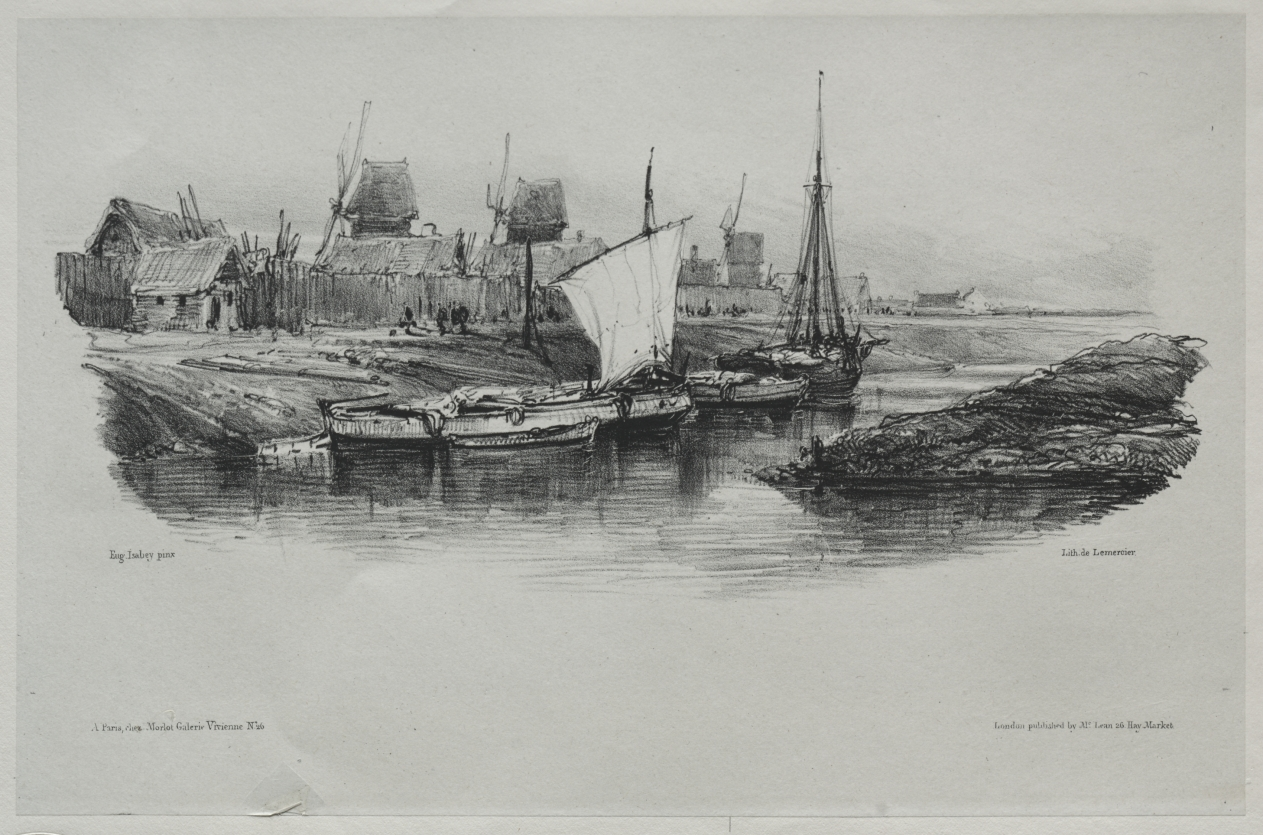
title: Souvenirs: Canal Bank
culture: France, 19th century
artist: Eugène Isabey (French, 1803–1886)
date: 1832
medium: lithograph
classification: Print